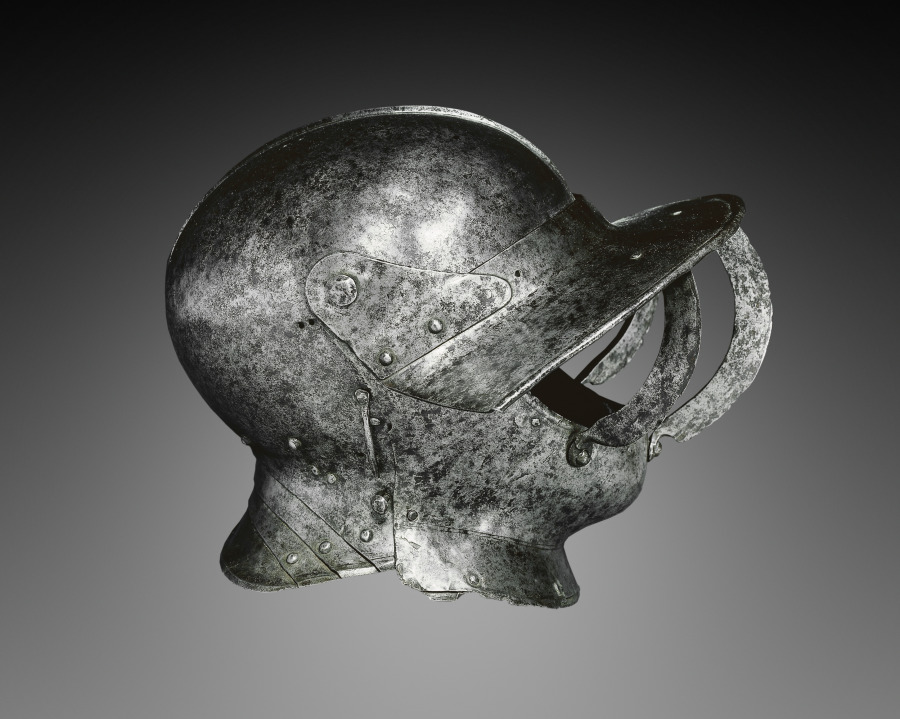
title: Close Helmet (Burgonet)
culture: Italy, Milan (?), early 16th Century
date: early 1500s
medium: steel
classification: Arms and Armor